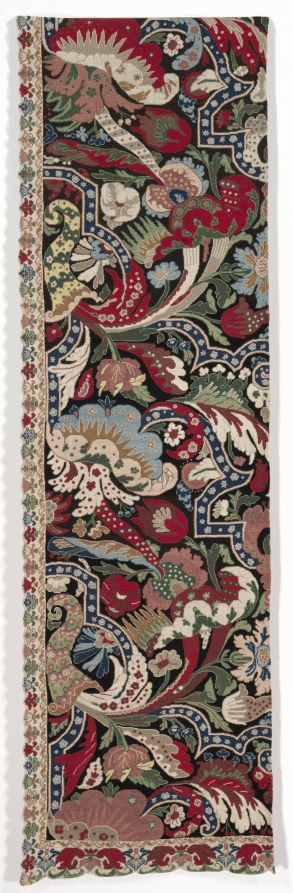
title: Needlework Bed Hanging in the Bizarre style (left half)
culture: France, 18th century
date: 1710–20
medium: Silk, wool; needlework, tent, and cross-stitch embroidery on canvas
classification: Embroidery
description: This panel is one of a pair that would have hung originally around a bed post as part of a full set of hangings on a bedstead in the early 1700s. Elaborate textile hangings were a conspicuous display of wealth since many ladies received their friends within their bedchamber. A full set enveloped the entire bedstead and, when closed, helped retain warmth long after the fire had gone out. This particular pair of panels is remarkable in that they represent many hours of highly skilled needlework. Their design is known as a "bizarre" pattern, which mimicked woven silks of the same era that were asymmetrical, boldly stylized adaptations of Asian fabrics that were coming into the European market from the trading routes at the time.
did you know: The design of this needlework panel is known as a "bizarre" pattern.